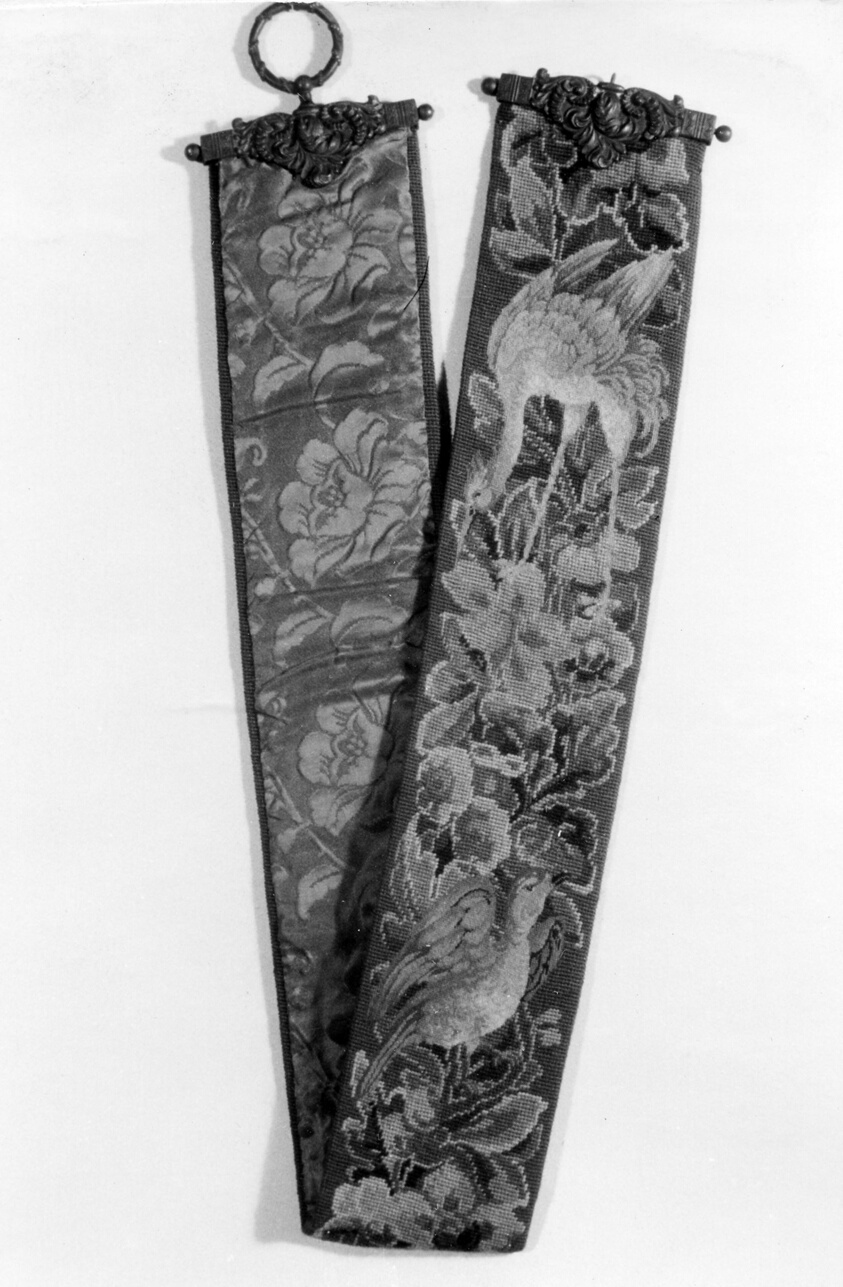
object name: Textile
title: Bell Pull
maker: England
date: 1825/75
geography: England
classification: textile; needlework (visual works)